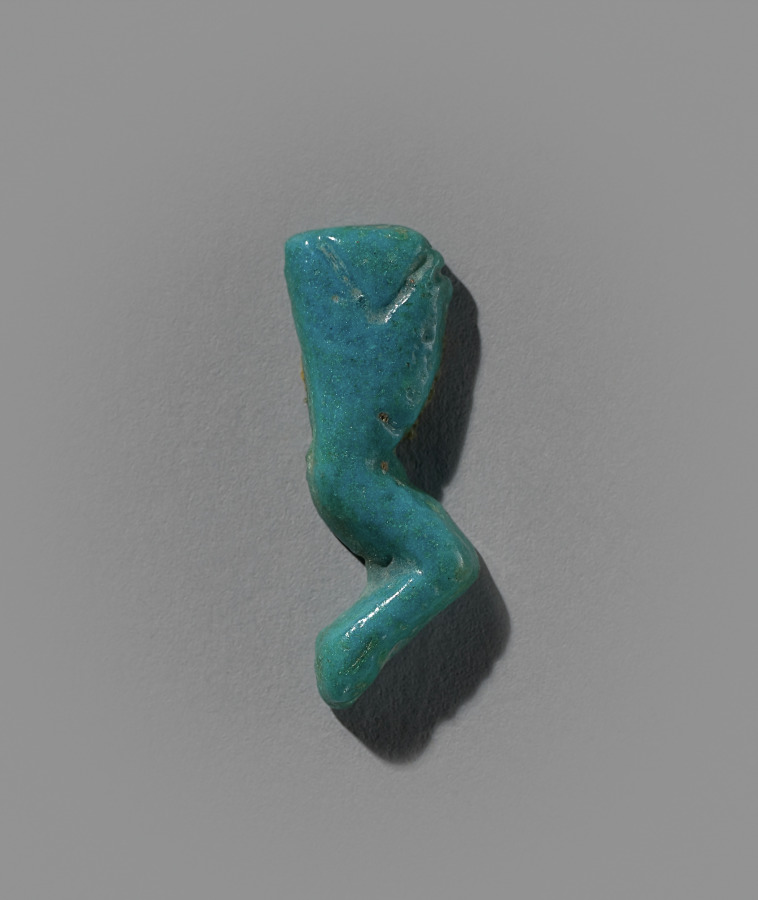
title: Food Model Amulet: Haunch of Beef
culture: Egypt, New Kingdom (1540–1069 BCE), Dynasties 19–20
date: 1295–1069 BCE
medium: turquoise faience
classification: Amulets